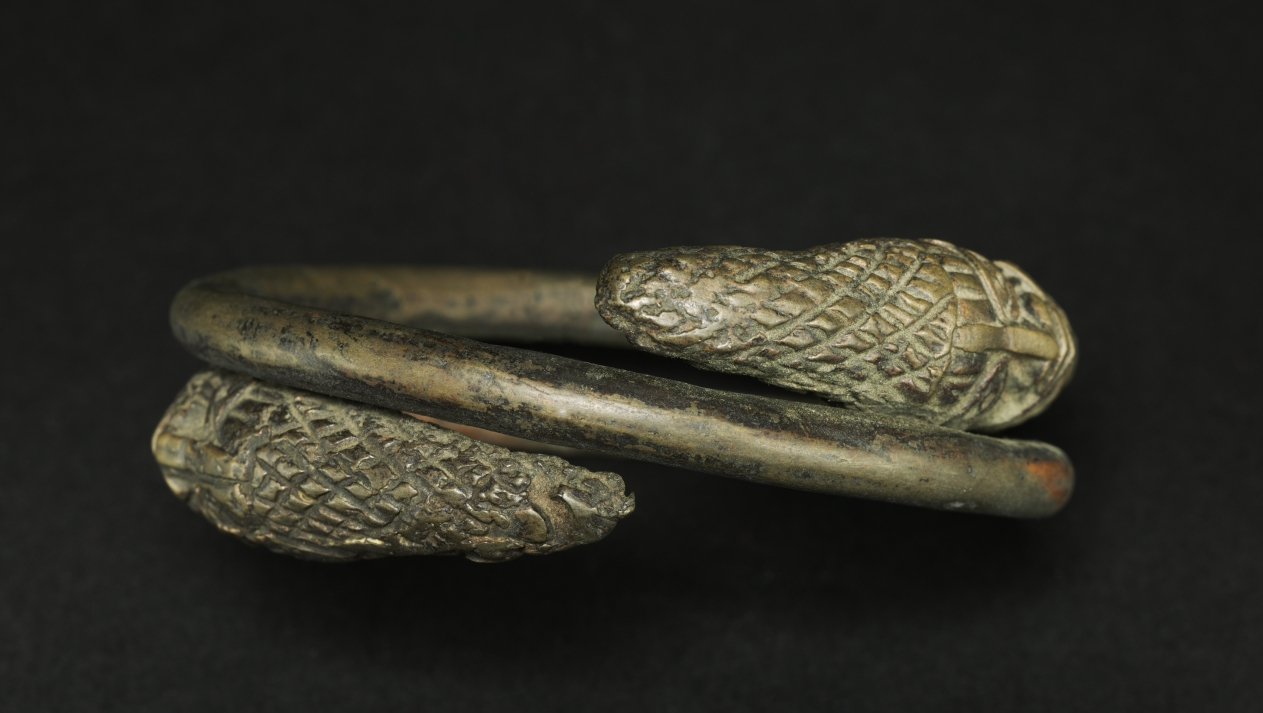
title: Hand Coil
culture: Nigeria, Benin Kingdom, Ẹdo peoples, members of the Igun Eronmwon (royal brasscasters) guild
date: 1800s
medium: Copper alloy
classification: Implements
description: While this looks like a bracelet, it wasn’t worn around a wrist. A chief or titleholder grasped this “hand coil” vertically during the annual Iguẹ festival, during which such men reaffirm their relationship to the Ọba, whose mystical powers are strengthened. An image of a man’s head caps each end of the thick, twisted metal. Repeated human touch rubbed the undecorated lengths bright and shiny. Though small, the coil’s detail is enormous: to capture it, the artist incised the designs in wax during the casting process. They show these men are elites, with necklaces, caps, and whisker-like facial markings.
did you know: This is a unique object; it was made using the lost-wax casting technique, which destroys the wax mold in the creation process.